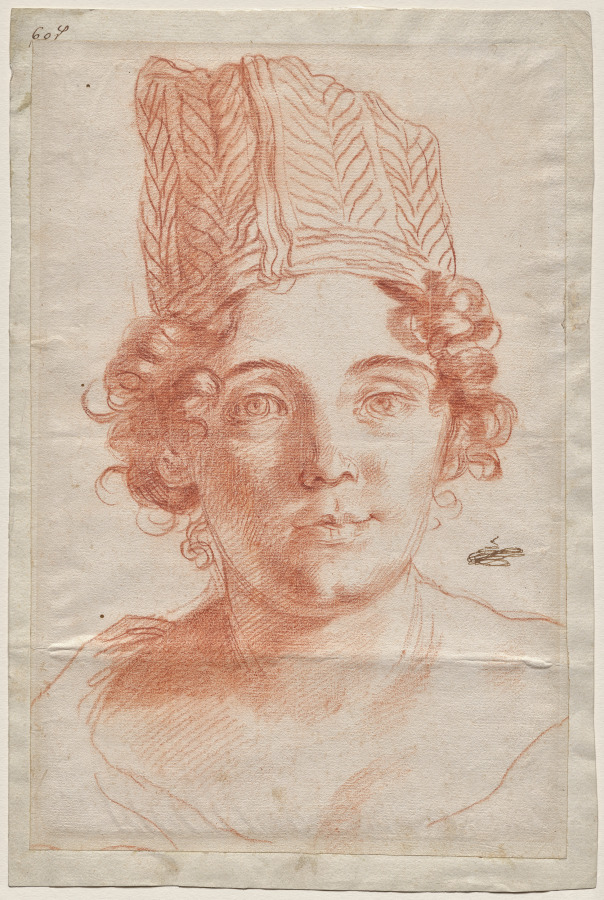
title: Portrait of Francesca Gommi, Wife of Carlo Maratti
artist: Carlo Maratti (Italian, 1625–1713)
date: c. 1670s-80s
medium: red chalk on paper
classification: Drawing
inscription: inscribed with paraph of Ignacio Augustin de Hermosilla Sandoval y Rojas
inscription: laid down on album sheet inscribed “60 R”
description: This portrait drawing by Carlo Maratti conveys the immediacy of being drawn while the artist looked directly at the sitter’s features. The sitter, Francesca Gommi, was Maratti’s mistress (later wife), who he also depicted in a formal portrait, now in the CMA’s collection (see 2018.1). This drawing, instead, depicts an intimate moment. Adding to the casual nature of the portrait, Gommi wears a whimsical rimless hat, which may be a sleeping cap.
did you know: The sitter of this portrait was the mistress of the artist and later his wife.